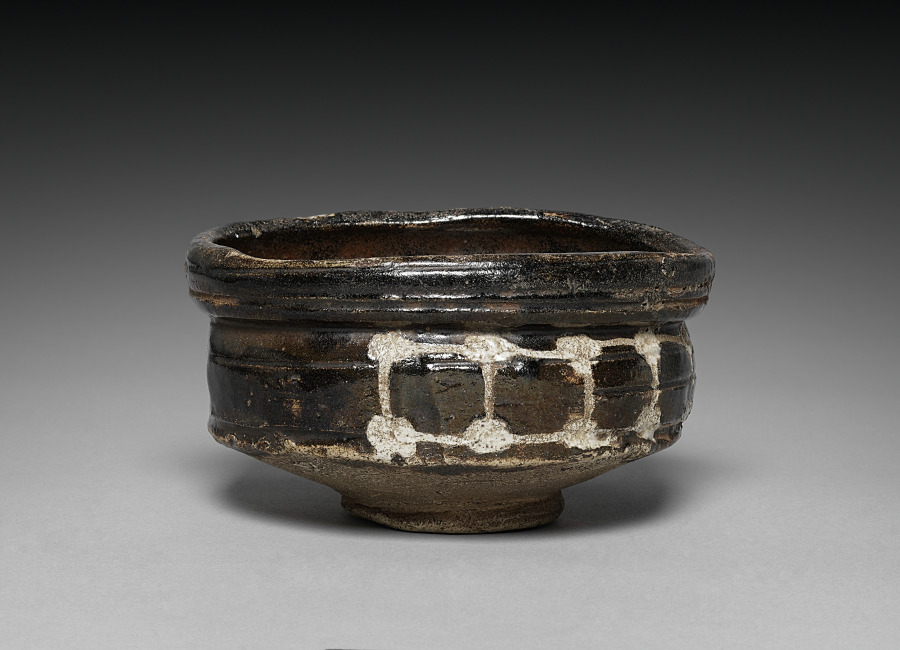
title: Clog-shaped Teabowl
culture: Japan, Momoyama period (1573–1615)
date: early 1600s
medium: Glazed stoneware (Mino ware, Oribe type)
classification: Ceramic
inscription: Mark: cross on base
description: Tea gatherings are fundamental to Japanese culture. Teabowls like this one are the most important objects used in tea practice. Its oblong shape and bold abstract designs are the signature style of the time period in which it was produced. That style is called Oribe, named for the tea master who championed the aesthetic.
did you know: Oribe is a government position. It means the person in charge of textiles.